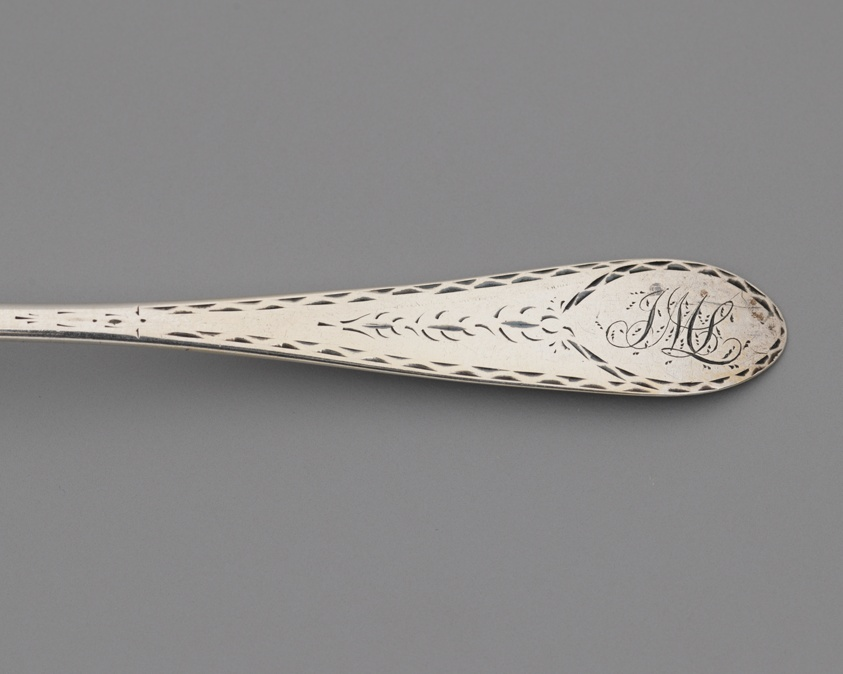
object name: Metalwork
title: Spoon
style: 18th Century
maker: Benjamin Halsted (American, 1734–1817); Probably Philadelphia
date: 1779–85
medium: Silver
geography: Philadelphia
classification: decorative arts; spoon